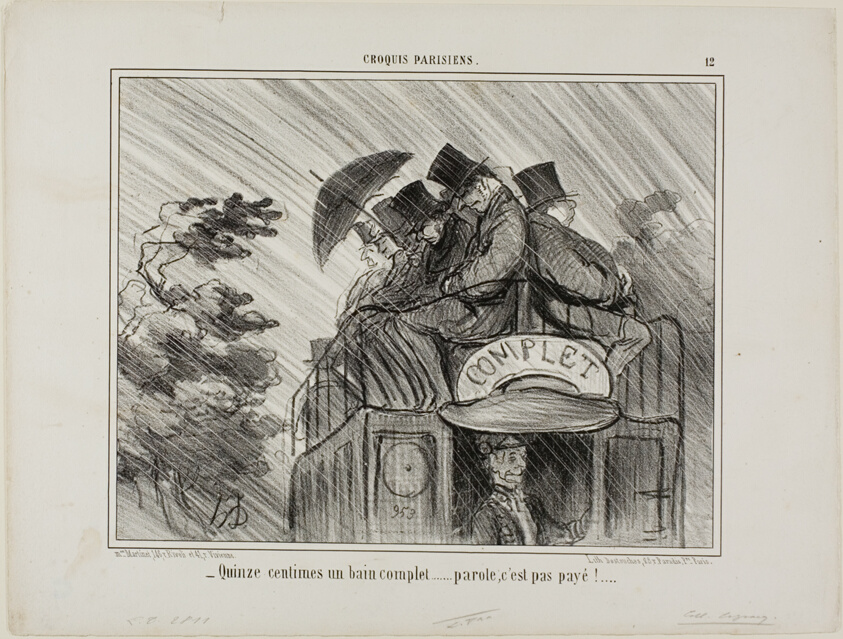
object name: Print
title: “- Just 15 cents for a full bath.... what a deal!,” plate 12 from Croquis Parisiens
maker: Honoré Victorin Daumier; French, 1808-1879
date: 1856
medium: Lithograph in black on white wove paper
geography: France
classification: lithograph; print; prints and drawing